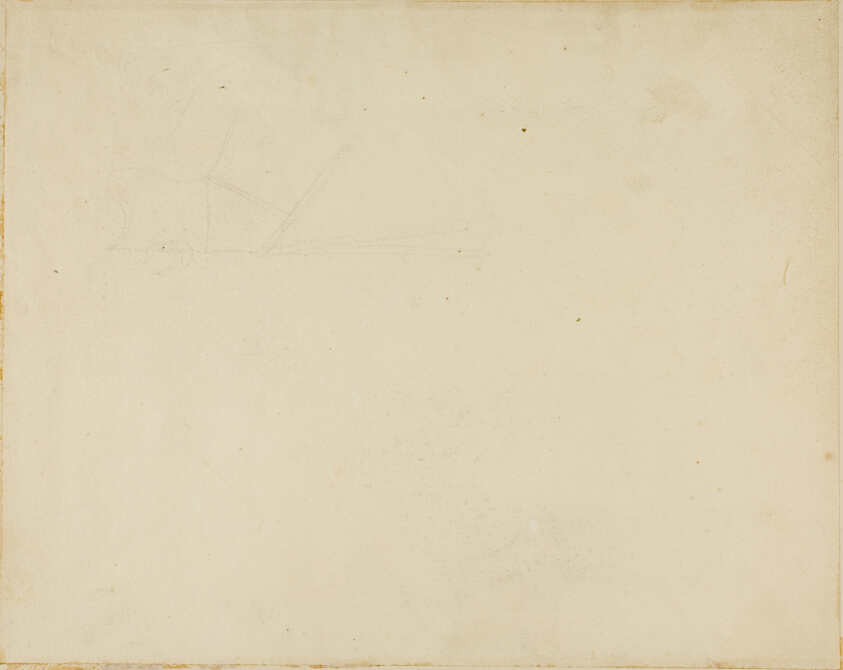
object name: Drawing and Watercolor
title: Sketch of Farm Implement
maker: Jean Louis André Théodore Géricault (French, 1791-1824); or Horace Vernet (French, 1789-1863)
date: 1818/19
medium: Graphite on cream wove paper, perimeter mounted on cream wove paper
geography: France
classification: drawings (visual works); prints and drawing